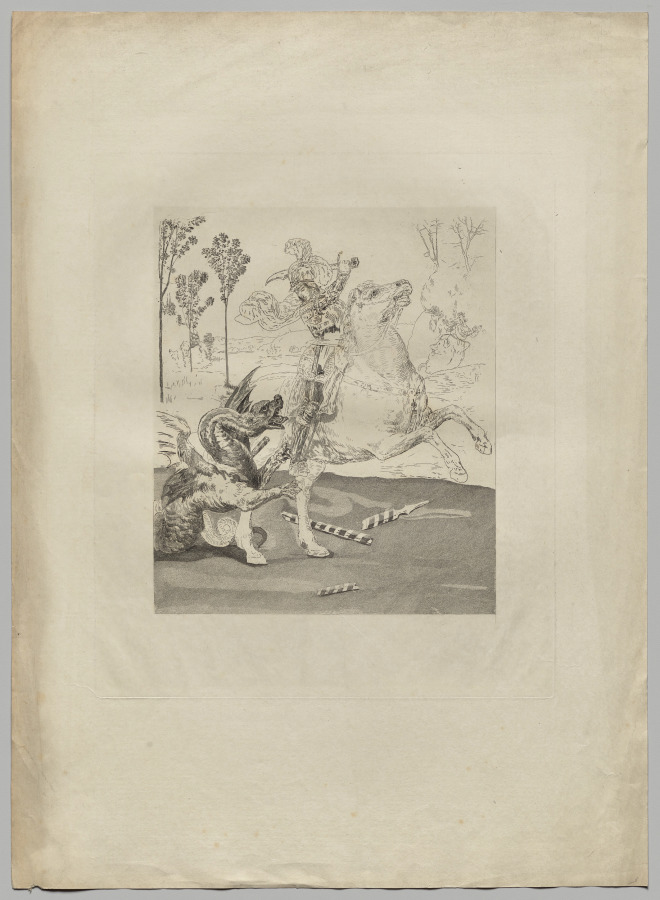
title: St. George and the Dragon (1)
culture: France, 19th century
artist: Claude-Ferdinand Gaillard (French, 1834–1887)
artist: after Raphael (Italian, 1483–1520)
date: 1885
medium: engraving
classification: Print